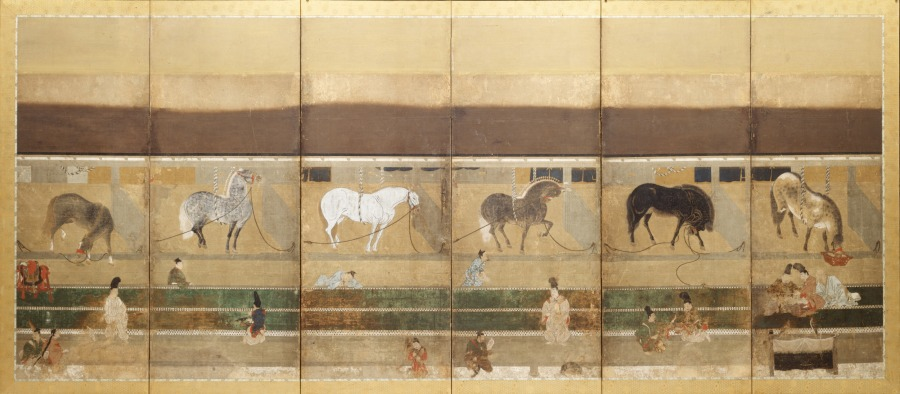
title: Horse Stable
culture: Japan, Muromachi period (1392–1573)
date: early 1500s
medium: Pair of six-panel folding screens; ink, color, and gold on paper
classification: Painting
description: Prized horses in stables may be the main theme of this pair of screens, but a lot of action is happening on the verandas. Falconry is the focus of one of the screens, while in the other, people challenge one another at two different boardgames, go and shōgi. A lively atmosphere develops in the interplay of the dynamic horses, the birds of prey, and the strategic games.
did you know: This is the earliest surviving example of the "horse stable" theme in Japanese screens.